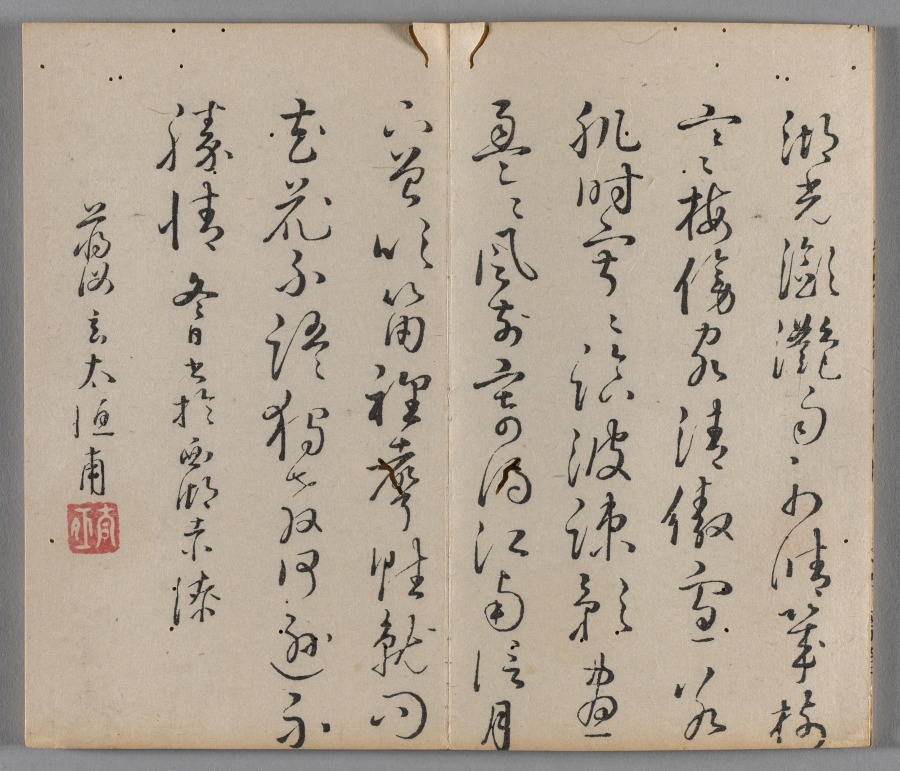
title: Ten Bamboo Studio Painting and Calligraphy Handbook (Shizhuzhai shuhua pu): Plum Blossoms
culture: China, Qing dynasty (1644-1911)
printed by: Hu Zhengyan (Chinese, c. 1584–1674)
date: 1633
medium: Woodblock-printed book; ink and colors on paper; first edition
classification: Print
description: Color printing reached a level of perfection in the early 1600s, as seen in this Ten Bamboo Studio Collection of Calligraphy and Painting and the Mustard Seed Garden Manual of Painting (printed 1679 and 1701). The painterly quality, precision in registering (aligning) the woodblocks, and harmonious colors made them the most successful color print editions in Chinese history. Both editions were printed and compiled in Nanjing, spread nationwide, and had a great impact on the arts in Japan and Korea.